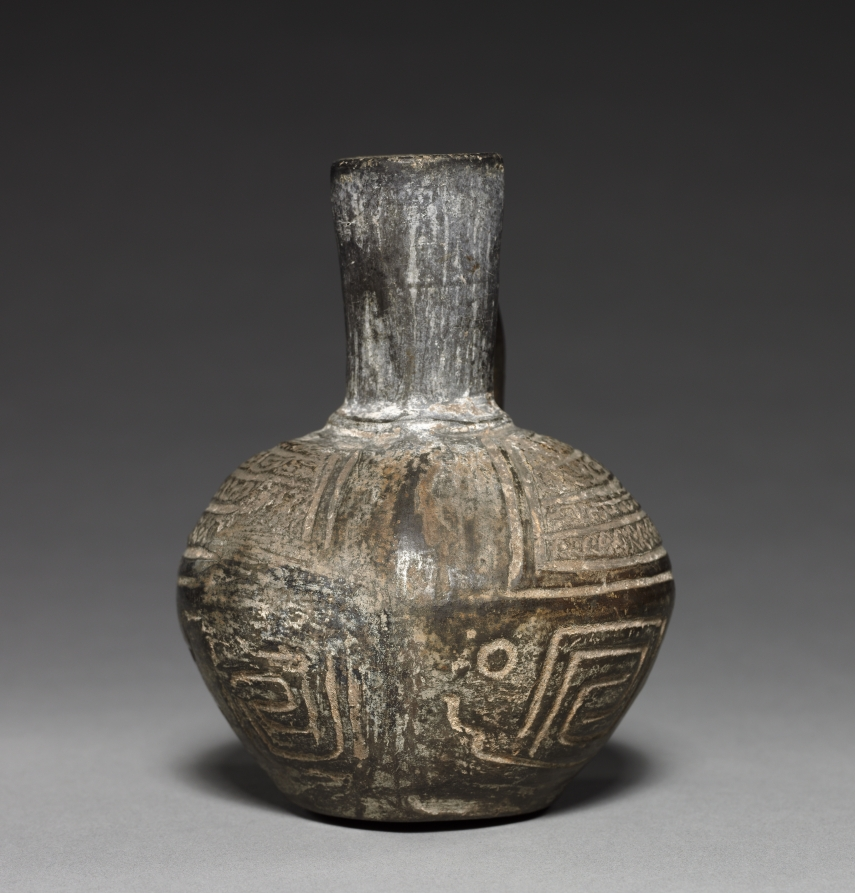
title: Bottle Vase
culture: Peru, Chimú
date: 1200–1400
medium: black ware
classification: Ceramic